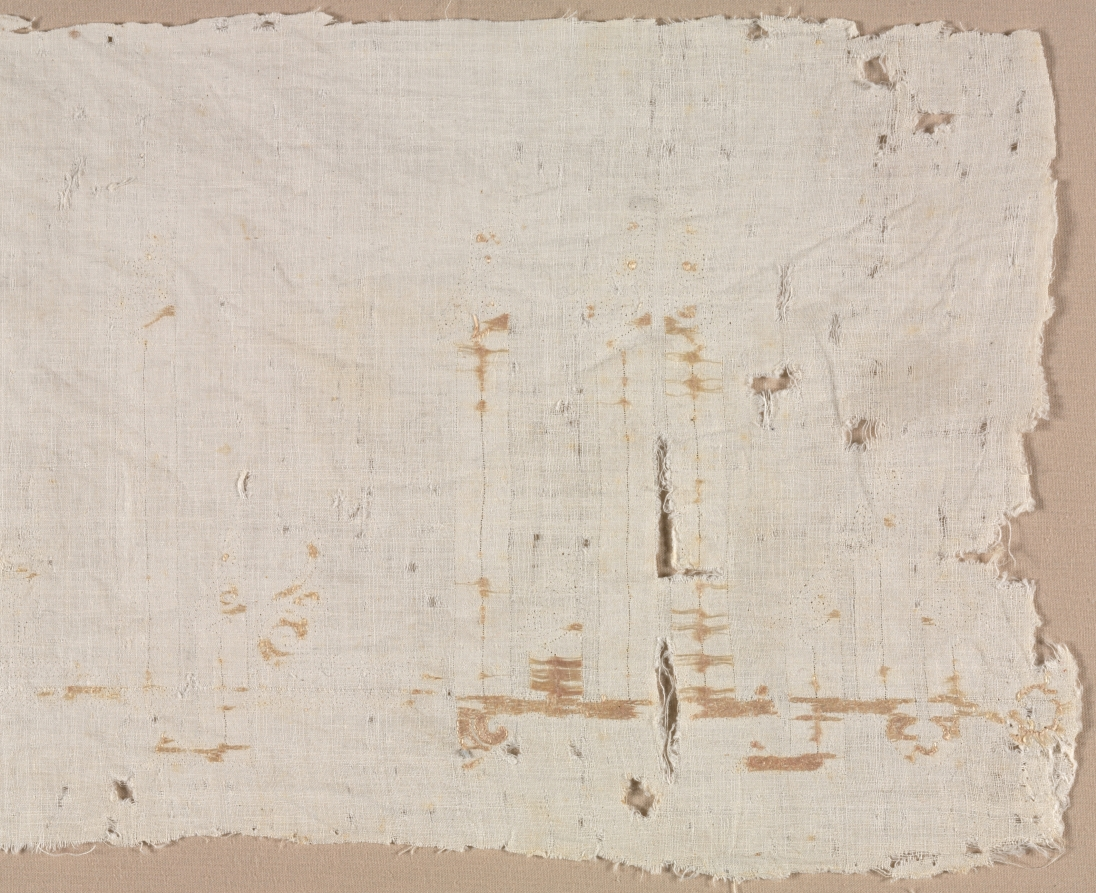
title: Tiraz of Caliph ‘Abd al-Rahman III, from the reliquary of Santa Librada, Cathedral of Seqüenza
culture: Spain, Cordoba, Spanish Umayyad period (756–1031)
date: 941–42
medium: Linen; silk: embroidery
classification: Embroidery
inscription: only the traces of a very large-scale elaborately foliated Kufic inscription preserved, largely in the form of needle holes but with a few small areas where the stitches are intact. This is approximately the second half of the original full inscription, which measured well over two meters long; the bulk of the original textile with the first half of the inscription was formerly preserved in the Cathedral of Siquenza. As preserved on the two fragments, the full inscription reads: "[Commander of the Be]lievers al-Masir li-Din al-Muslimin, may God support him! That which was made through the agency of Durri, his servant, in the year thirty and three hundred."